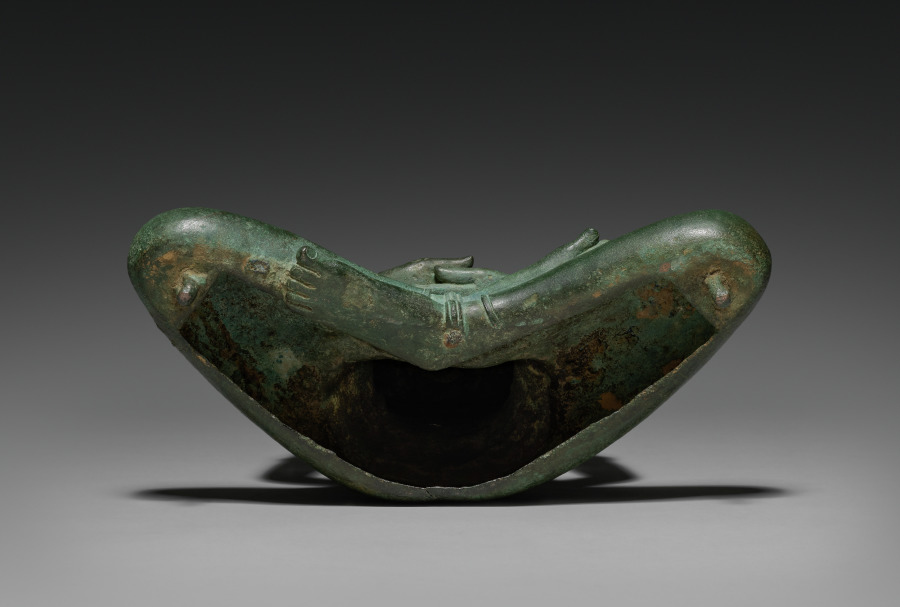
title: Naga-enthroned Buddha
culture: Cambodia, Angkor, Angkor Wat Period, 12th century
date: 1100–1150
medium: bronze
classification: Sculpture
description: Jayavarman VII, who built the great royal temple at Banteay Chhmar, linked himself with the image of the Buddha seated on a serpent, or naga, as the divine form under which he would be honored. During his reign, the naga-enthroned Buddha became a ubiquitous image for veneration, often set up together with Lokeshvara, who was associated with his father, and Prajnaparamita, the form under which his deceased mother was honored. Lokeshvara is the powerful enlightened being of compassion, while Prajnaparmita is the goddess who personifies wisdom. King Jayavarman VII, therefore, presented himself as the enlightened Buddha, the product of the union of Compassion and Wisdom, supported and glorified by the naga, which refers to the Khmer people. Images of the naga-enthroned Buddha have been found at Banteay Chhmar, both in architectural relief sculpture and as icons in the round. After the death of Jayavarman VII, followers of other forms of Buddhism (for example, Theravada) that became prevalent in Cambodia changed the meaning of the naga-enthroned Buddha and reinterpreted the image to refer to a scene from the historical Buddha’s life story in which a serpent protected him from a flood. The crowned and bejeweled aspect of this Buddha, though, indicates that it is another kind of transcendent figure. In his lap his hands are in a posture of meditation, holding what appears to be an offering of ceremonial rice referring to the hope that he will ensure the prosperity of the land.